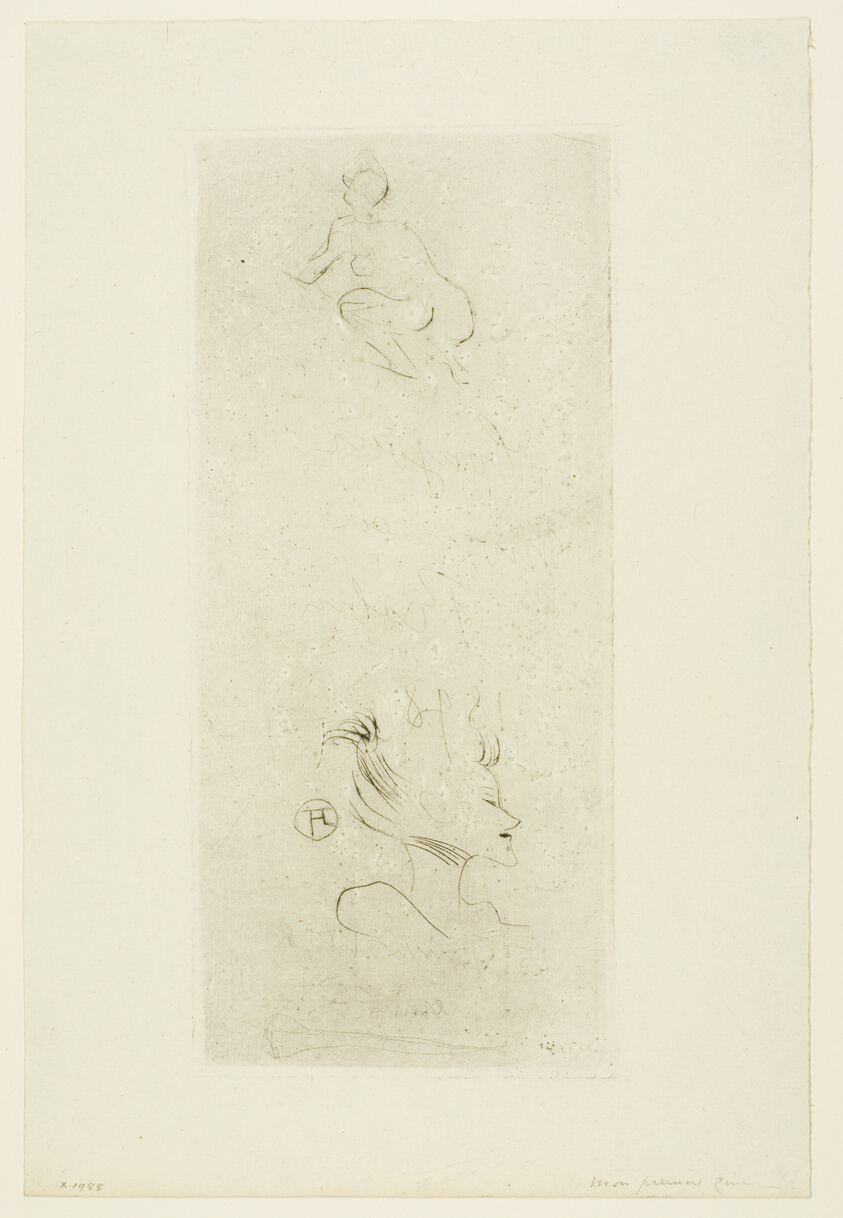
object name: Print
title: Cover for La Tribu d'Isidore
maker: Henri de Toulouse-Lautrec (French, 1864-1901)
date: 1897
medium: Color lithograph on cream wove paper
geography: France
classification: lithograph; print; prints and drawing